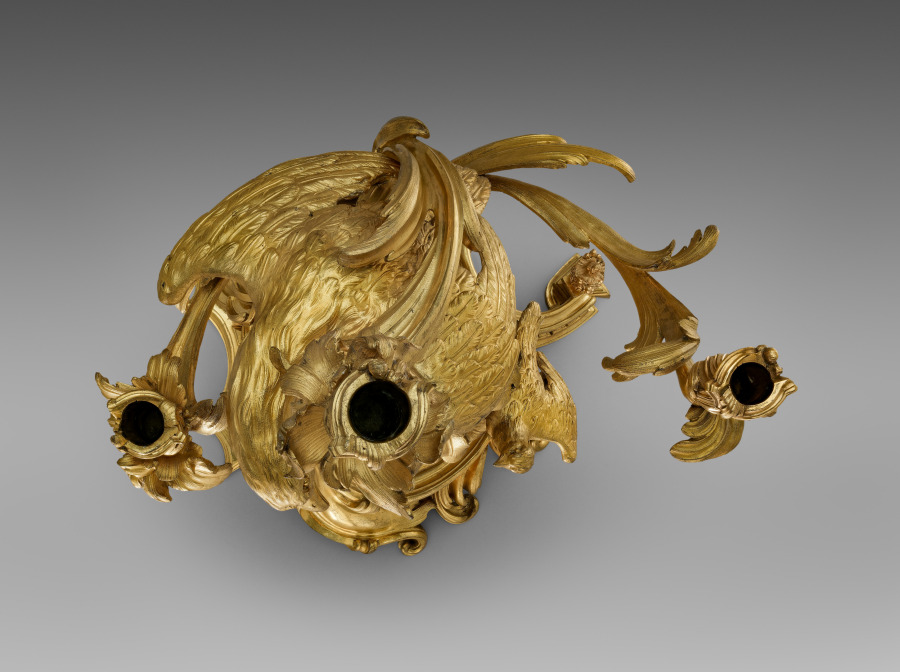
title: Candelabrum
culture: France, 18th century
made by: probably by Jean Joseph de Saint-Germain (French, 1720–1791)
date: c. 1750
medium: gilt bronze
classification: Furniture and woodwork